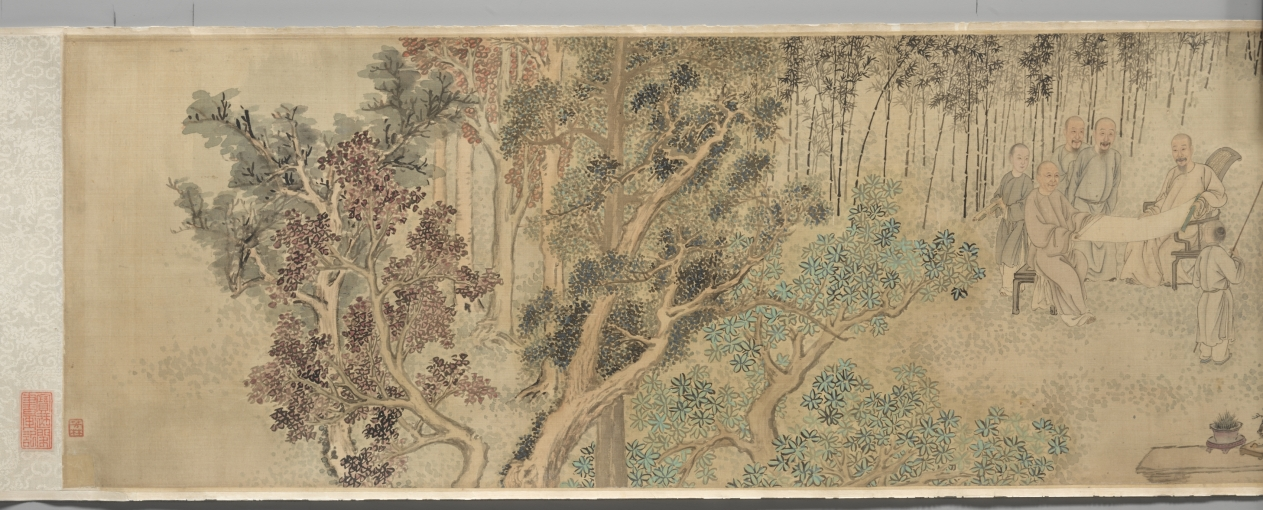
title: The Ninth Day Literary Gathering at Xing’an [Temporary Retreat]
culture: China, Qing dynasty (1644-1911)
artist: Fang Shishu (Chinese, 1693–1751)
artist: and Ye Fanglin (Chinese, active late 1600s–mid-1700s)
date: 1743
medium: Handscroll; ink and color on silk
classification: Painting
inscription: Fang Shishu's seal at beginning of painting: Ou ran shi de 偶然拾得. Ye Fanglin's seal at end of painting: Fanglin 芳林. Frontispiece title dated 1743 and 3 seals of Chen Bangyan 陳邦彦 (1678-1752).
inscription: 行庵在揚州北郭天寧寺西隅，馬君嶰谷半槎兄弟購僧房隙地所築，以為游息之處也。寺為晉謝太傅別墅。西隅饒古木，䨴鬱陰森，入林最僻，不知其近郛郭。庵居其中，無斲礱髤采之飾，惟軒庭多得清蔭，來憩者每流連而不能去。乾隆癸亥九日，積雨既收，風日清美，遂約同人，咸集於斯，中縣［懸］仇英白描陶靖節像，采黃花，酌白醪為供，乃以人世難逢開口笑，菊花雖插滿頭歸分韻賦詩。陶陶衎衎，觴詠竟日。既逾月，吳中寫真葉君敬［震］初適來，群貌小像，合為一卷，方君環山補景，命曰九日行庵文讌圖。裝池成，將各書所作於後，而囑鶚為之記。記按圖中共坐短榻者二人：右箕踞者，為武陵胡復齋先生期恆；左抱膝者，為天門唐南軒先生建中也。坐繩床者二人：中手牋者，歙方環山士庶；左仰首如欲語者，江都閔玉井華也。一人坐藤塾捻髭者，鄞全謝山祖望也。一人倚石坐若凝思者，臨潼張漁川四科也。樹下二人：離立把菊者，錢唐厲樊榭鶚；袖手者，錢唐陳竹町章也。一人憑石床坐撫琴者，江都程香溪先生夢星也。聽者三人：一人垂袖立者，祁門馬半查曰璐；二人坐瓷塾，左倚樹、右跂腳者，歙方西疇士疌 、汪恬齋玉樞也。二人對坐展卷者，左祁門馬嶰谷曰琯，右吳江王梅沂藻也。一人觀者，負手立於右，江都陸南圻鐘輝也。從後相倚觀者一人，歙洪曲溪振珂也。童子種菊者三人：樹間侍立者一人，撰杖、執卷者各一人。其植有蕉、有竹，又有雜樹，作丹黃青碧之色，紀時也。夫重九佳名，舉俗所重，而高常侍歎獨坐而搔首，陸天隨感登高以剫門，無其時地與人耳。今吾儕幸生太平，遇勝地，又皆素心有文之侶，固人世不可多得之會；而此十六人者，或土斷，或客游，聚散不常。異日者，歲月遷流，撫節物以有懷，一披此圖，悅如晤對。將來覽者，或亦不異此意乎。甲子夏五十有四日厲鴞記並書。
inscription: 揚州為江北大都會，居民連甍接楹，笙歌輿從，竟日喧聚，其於淸歌雅集，葢罕矣。城北天寧寺，為晉謝公駐節時所游息，其中有行庵，吾友馬君嶰谷、半查兄弟之小築也。地不踰五畝，而老樹古藤，森蔚相望，皆千百年物，間以修竹，春鳥秋蟲，更唱迭和，其間曲廊高榭，位置閑適。出門未數百步，即黃塵濁流極目，令人作惡。而此中獨蕭然有人外之思。乾隆八年九日，嶰谷兄弟招集同社一十四人祀陶公，出所藏仇實父白描像懸於閣上，各賦一詩。予方留滯西泠，未得預也。又踰旬而予至，諸君方擬繪圖記事，嶰谷曰：是不可無君。乃以展日更舉，令予得陪卷軸之末；而洪君曲溪，兩度皆以病失約，然故吟社中人也，亦補入焉。予太息謂諸君曰：謝公之風流，千古如在；然其游息於斯也，則與東山賓從之樂稍不同矣。公之為是行也，蓋以符氏之亂，思北定中原也。而其時公巳困於讒口，不自安於朝；雖在河朔極有可乘之會，而神明內索，徘徊不克自前。老師左次，竟無尺寸之功，坐失事幾。吾常過邵伯之埭，吊法雲之荒祠，未嘗不喟然累啼，以為明德之衰也。至若九日嘉名，陶公高格，固在羲皇懷葛之間；然而讀其 止酒之詩，蒼梧漢水之感，以瘦詞寄其孤憤則夫黃花白酒，蓋亦不得巳而漫與焉者。今吾輩生逢太平之日，書淫墨癖，是處留連，胸次中了無一事，為江湖之幸民，論人雖甚媿，論其時與地，則不可不私相慶也。諸君曰：善。圖之詳巳見於厲君樊榭記中。予之許為嶰谷兄弟序斯圖也，三年於茲；今夏重披圖捉筆，而唐丈南軒，巳化為異物矣。對酒當歌，人生幾何，願與諸君並日相遇從焉。丙寅夏杪孤山社小泉翁全祖望序。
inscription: 6 additional colophons and 15 additional seals: 1 colophon, dated 1746, and 1 seal of Huang Zhijun 黃之雋 (1668-after 1746); 1 colophon and 2 seals of Zha Xiang 查祥 (1718 jinshi); 1 colophon, dated 1746, and 3 seals of Zhang Siwen 張思問; 1 colophon, dated 1748, and 4 seals of Shao Dong 卲東 (1721 jinshi); 1 colophon, dated 1753, and 2 seals of Fang Shiju 方世舉 (signing as Fang Funan 方扶南); 1 colophon, dated 1808, of Ruan Yuan 阮元 (1764–1849); 3 seals unidentified.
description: By the 1700s, Yangzhou was flourishing both economically and culturally as the most prosperous city in China, having surpassed all other Jiangnan cities in their creation of gardens. This group portrait commemorates a literary gathering in the private garden of the salt merchants and art patrons Ma Yueguan (1688–1755) and his brother Ma Yuelu (1697–after 1766) in Yangzhou. Ma Yueguan received imperial recognition for providing financial aid and food relief for those affected by flood and drought. Ma Yueguan is seen seated at the end of the painting holding an open scroll while Ma Yuelu stands behind the qin instrument player. Among the guests were officials, scholars, poets, painters, and merchants, a mix of local members of a poetry club reflecting increasing social diversity.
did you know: The two hosts and their fourteen guests were all officials, scholars, poets, painters, and salt merchants.